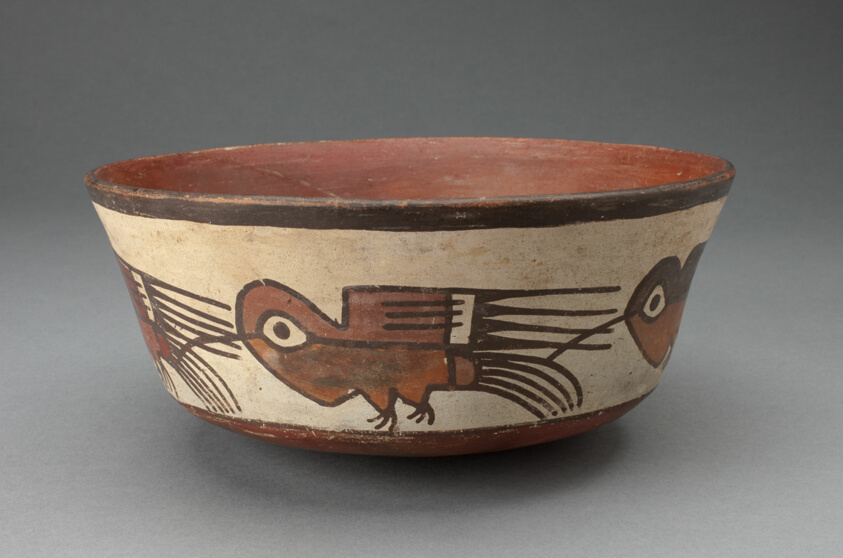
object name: Vessel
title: Bowl Depicting a Row of Hummingbirds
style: nazca, early intermediate period, Pre-Columbian, americas, Arts of the Americas, andean, andes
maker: Nazca; South coast, Peru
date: 180 BCE–500 CE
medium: Ceramic and pigment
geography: Nazca Valley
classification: bowl; earthenware; art of the americas; ceramics; vessel